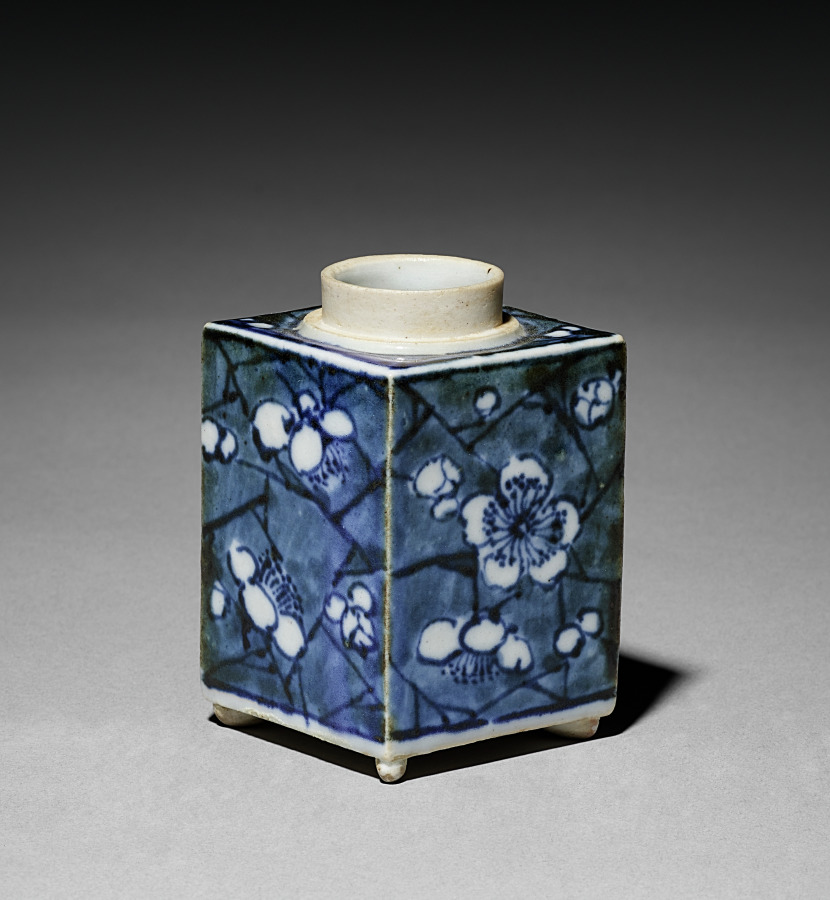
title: Tea Container with Plum Blossoms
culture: Japan, Edo period (1615–1868)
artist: Aoki Mokubei (Japanese, 1767–1833)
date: early 1800s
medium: porcelain with underglaze blue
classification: Ceramic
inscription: signed "Ro Mokubei" on base in underglaze blue.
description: Aoki Mokubei, born into a family of restaurateurs, was a potter, calligrapher, painter, and scholar, and is considered one of the three masters of later Edo period Kyoto ceramics. He specialized in porcelains fashioned after Chinese prototypes, and created works for steeped tea (sencha) such as these matching tea caddies decorated in an underglaze blue called sometsuke—literally “with applied dye.” He signed them on their bottoms. They also have intricately patterned silk sleeves to both beautify and protect them. On the exterior of the lid of the outer wooden box that contains them, it is written that Mokubei inscribed and painted an image on the box. On the interior of the lid, the signature and seals of a former owner are written. Mokubei has signed the lid of the inner box, and a charming ink and light color composition of West Lake in Hangzhou in China covers its three sides. On the fourth side is a long inscription by Mokubei describing the scene.